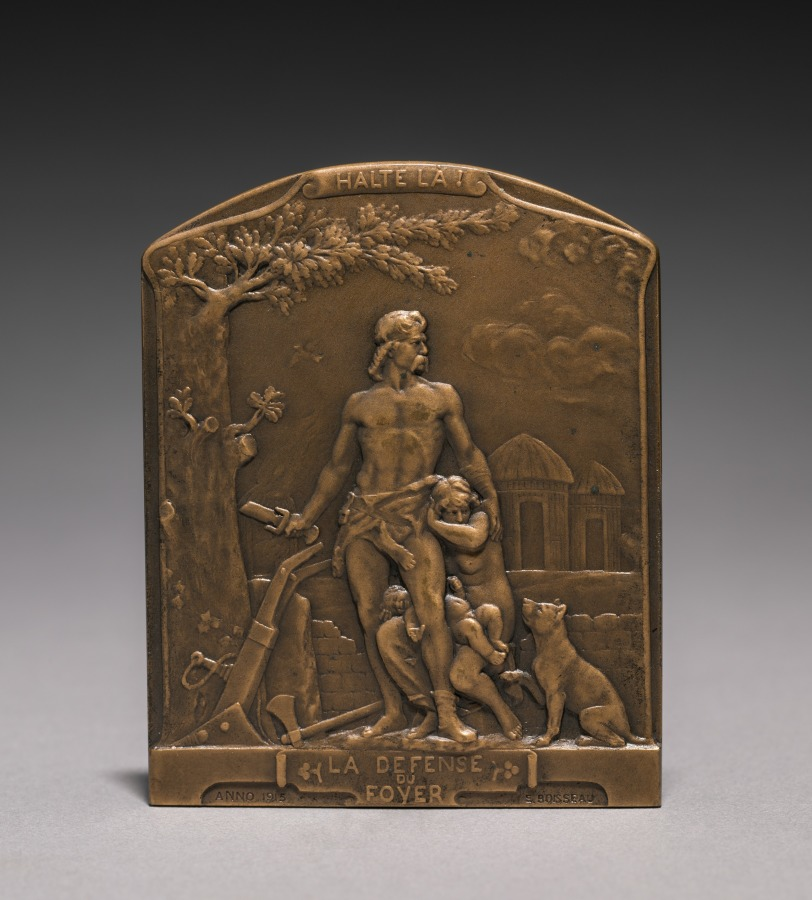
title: Medal (obverse)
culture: France, 20th century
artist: Emile André Boisseau (French, 1842–1923)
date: 1914–1918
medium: bronze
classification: Metalwork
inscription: above: "Halte là"; below: "La defense du foyer."